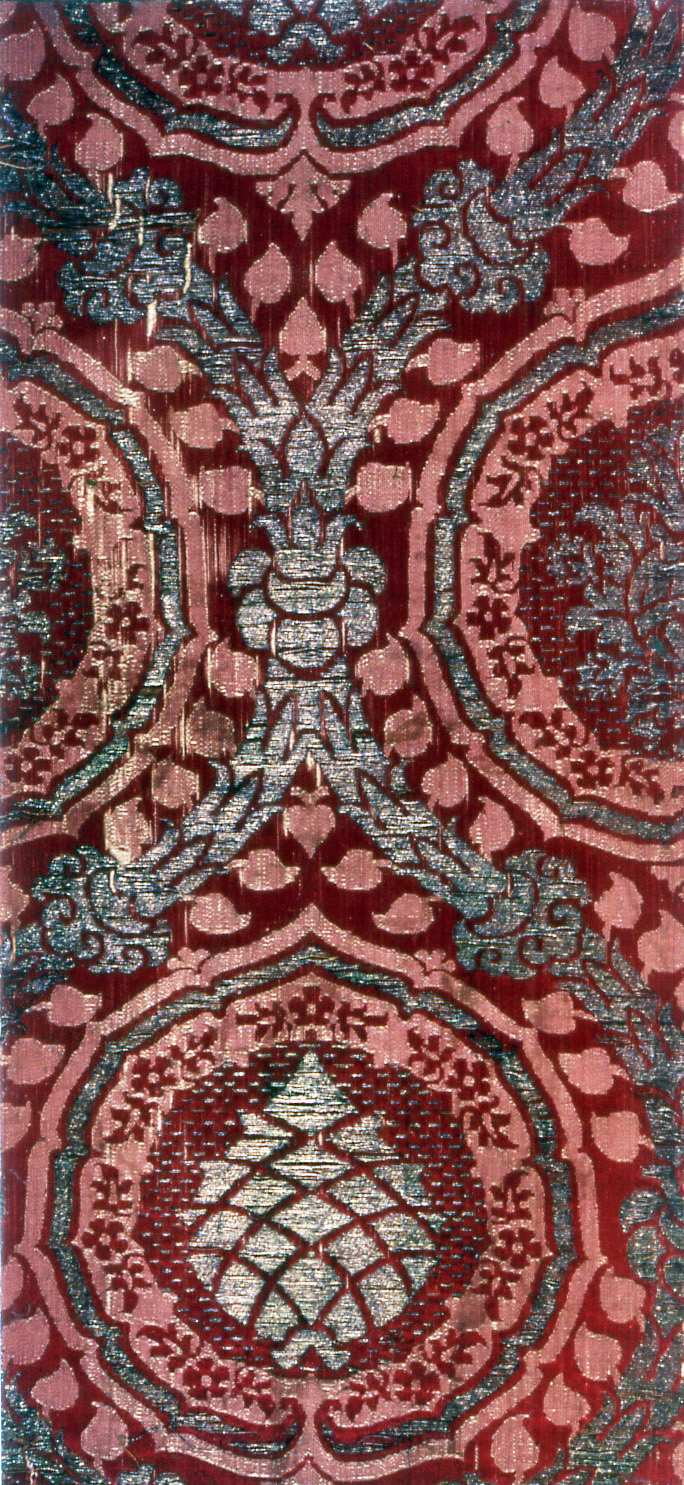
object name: Textile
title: Fragment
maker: Italy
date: 16th century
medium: Silk and gilt-metal-strip-wrapped silk, 4:1 satin damask weave with supplementary brocading wefts bound by main warps in weft-float faced 1:4 'S' twill interlacings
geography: Italy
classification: textile; weaving